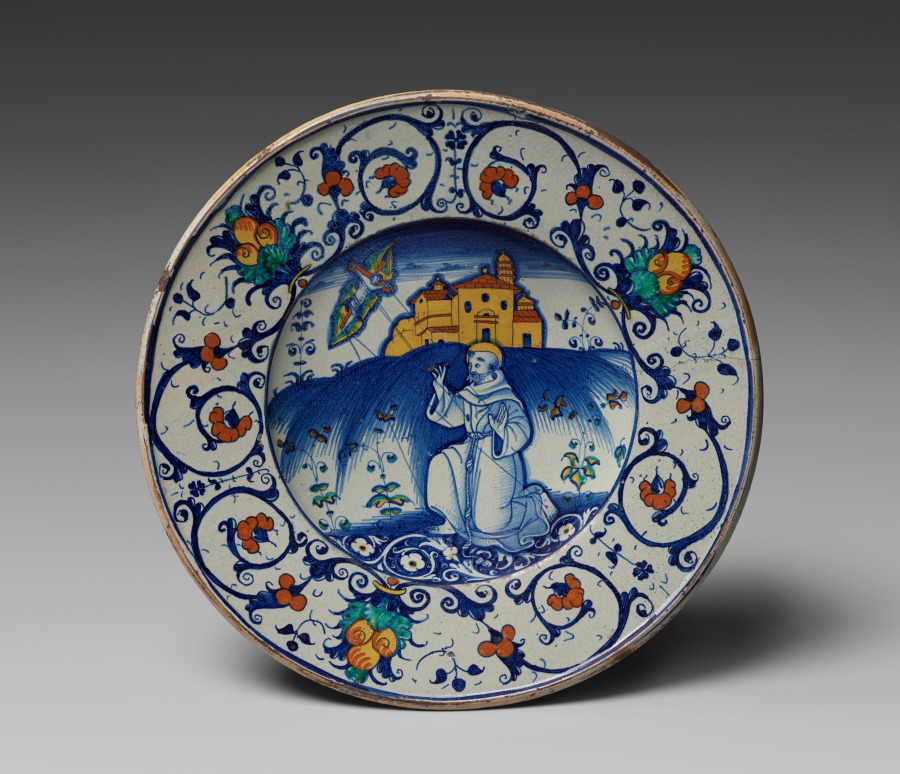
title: Bowl Depicting Saint Francis Receiving Stigmata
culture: Italy, Deruta, 16th century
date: 1531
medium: tin-glazed earthenware (maiolica)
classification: Ceramic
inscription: dated on reverse: "1531"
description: In this depiction representing his closeness to Christ, Saint Francis receives the stigmata through strikes of light from a vision of the risen Lord hovering as an angel in front of the basilica at Assisi. This bowl likely recalls a panel painting produced by the Italian master painter Giotto around 1300.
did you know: According to Christian tradition, the stigmata correspond to the appearance of Christ’s wounds at similar places on the faithful following his crucifixion.